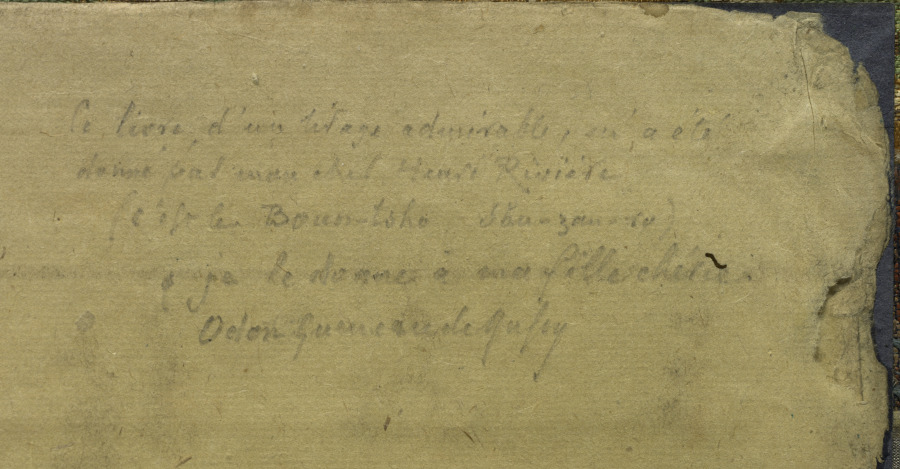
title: Preface from Shazanrō Picture Book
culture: Japan, Edo period (1615–1868)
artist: Tani Bunchō (Japanese, 1763–1841)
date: 1816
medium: Woodblock-printed book; ink and color on paper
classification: Bound Volume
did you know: Shazanrō was one of Tani Bunchō's style names.